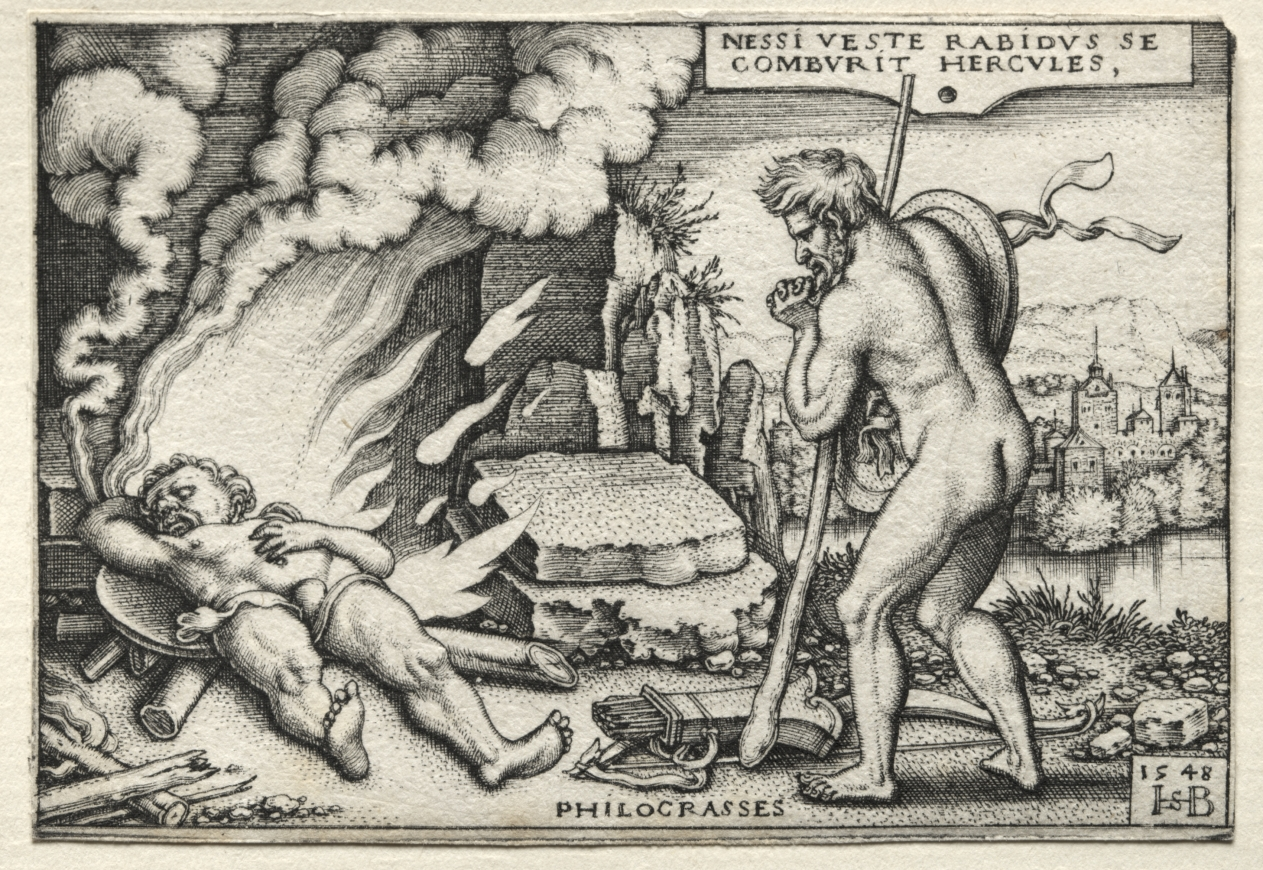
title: The Labors of Hercules: Hercules on his Pyre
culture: Germany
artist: Hans Sebald Beham (German, 1500–1550)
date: 1548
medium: engraving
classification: Print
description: Driven insane by the shirt soaked in poisonous blood, Hercules builds a funeral pyre to cremate himself alive. He enlists a passing shepherd to light the pyre; Hercules rewards the shepherd with the gift of his weapons. Beham was one of several German printmakers referred to today as the “Little Masters.” They established their artistic prowess by engraving remarkably small prints, appealing to collectors fascinated with miniature objects and curiosities.